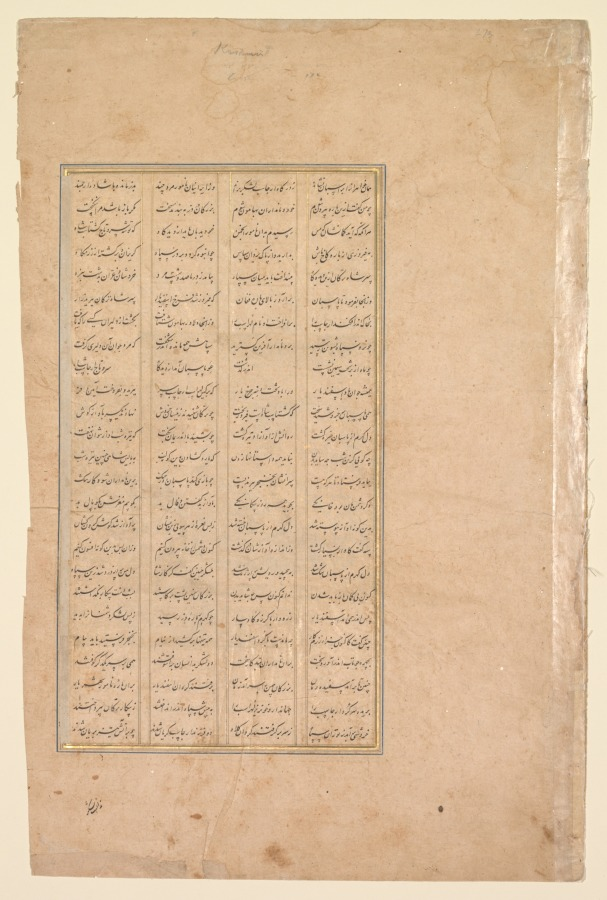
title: Isfandiyar slays Arjasp, the king of Turan, from a Shah-nama (Book of Kings) of Firdausi (Persian, about 934–1020)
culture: Mughal India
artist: Haidar Kashmiri (Indian, active late 1500s-early 1600s)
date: 1600–1605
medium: Gum tempera, ink, and gold on paper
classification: Painting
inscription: Persian inscription in left margin, in nasta‘liq script: 25 / Haidar Kashmiri; Persian title in nasta‘liq script: The Battle of Isfandiyar with Arjasp and The killing of Arjasp by the hand of Isfandiyar; Persian text in nasta‘liq script: He uttered these words, and hurried away from them Toward Arjasp’s court, bent on revenge He went forth, grasping a blade of Indian steel, Whomever of the notables his eyes fell on, was killed on the way So that in passing through the royal hall Hard it was to pick one’s way: So many wounded, battered, and dead Had turned the ground into a turbulent sea. When Arjasp awoke from his sleep His heart was troubled on hearing the din That he could not make out in the bedchamber. He put on his mail shirt and Roman-fashioned helmet Clutching in hand a burnished dagger, He shouted loud, blood coursing through his heart. The warrior Isfandiyar confronted him. They fought beyond measure and scale, Exchanging daggers and swords in a furious feud At times targeting the head, at times the waist, To him he (Isfandiyar) said, “Now from the tradesman Will you receive the gift of a blade, one glittering like a silver denarius. I have it as a gift for you, worthy enough to come from Luhrasp, inlaid with Gushtasp’s seal. He made Arjasp go limp and lifeless by the delivered cuts Nowhere on his body did he leave untouched. His mammoth body toppled over His head severed from the body by Isfandiyar. Such is the conduct of the revolving fortune: At times it offers us a honeyed potion, at others a deadly poison Why tie your heart to this transient place Since you know that you will not stay forever, do not grieve and pine. Having dealt with Arjasp, Isfandiyar Gutted the palace, its smoke reaching as far as Saturn He ordered torches lit Setting fire to the palace from all sides He entrusted his (Arjasp’s) women’s quarters to a eunuch, Taking all luster away from the place. He sealed off the treasury No one in Turan was now equal to his fight. He went to the stables and mounted A blade of Indian steel in his hand He selected among the Arab horses there And ordered them saddled A hundred and sixty men rode away from there Handpicked riders for the day of battle.; Verso: Text of Isfandiyar slays Arjasp, the king of Turan: Persian inscription in bottom margin, in nasta‘liq script: The army realized Persian text in nasta‘liq script: [cont. from recto] He furnished mounts, moreover, for his sisters, And marched forth from the court-gate of Arjasp, But left a few Iranians, men of name, With noble Sawa in the hold. “When we,” He said, “have gone outside the walls, I and my noble warriors, to the plain, Secure the gate against the Turkman troops, And may my good star aid me. When ye think That I have joined our noble troops outside, Then—let the watchmen from the lookout cry: ‘Blessed be the head and crown of Shah Gushtasp.’ And when the Turkman troops come toward the hold, In flight retreating from the battlefield, Then you shall throw the head of King Arjasp Before them from the tower of the watch.” The valiant hero rushed upon the plain, And slaughtered all the Turkmans that he found. As he approached the troops of Bishutan They saw and praised him in amazement that he, Who was so young, should show such bravery. When the moon had left her silver throne, And when three watches of the night had passed, The watchman shouted lustily, proclaiming: “Gushtasp, the Shah, has gained the victory, And may Isfandiyar be ever young. May heaven, moon, and fortune be his helpers, Who has in vengeance for Luhrasp beheaded Arjasp and, adding luster to our Grace And customs, cast him down from throne to dust, And made the name and fortune of Gushtasp Resplendent.” Hearing such a cry the Turkmans All listened while Kuhram grew dark of heart By reason of that watchman, was astonished, And spoke thus to Andariman: “How clear This cry is in the night! What do you say Can be the cause? Let us consult, for who Would dare to bawl thus by the monarch’s couch And after dark? What tricks might such a one Play in the day of battle, and thus bring Our nobles into straits! So send and have His head cut off, whoever he may be. If one of our own household is our foe, And he is backing up our enemies. “With evil words and evil presages, Then will we brain him with an evil mace.” Now when the cry went on persistently Kuhram was stricken to the heart with anger Against the watchman whose utterance, spread abroad In such a fashion, filled the nobles’ ears. The soldiers said: “The shouts increase, beyond A watchman’s! Let us drive the foemen forth And after take this host” Kuhram, who was straitened At heart about that watchman, writhed and frowned. He told the troops: “These men have filled my heart With dread about the king. We must return At once, past question. What may happen after I know not.” So that night they left the field, Where Isfandiyar, with ox-head mace And wearing mail, pursued them. When Kuhram had reached The portal of the hold, and saw the Iranians Pursuing, “What is left us,” he exclaimed: “But to fight with brave Isfandiyar? Unsheathe and send your message by the sword.” But fortune frowned and those famed chiefs fared ill. The two hosts raged and smote each other's heads Till morning came, and then the chiefs of Chin Had had their day. Ascending to the ramparts The warriors of Isfandiyar inside The hold flung down therefrom the severed head Of brave Arjasp—the king that had slain Luhrasp. The Turkmans fought no longer; from their host Arose a cry, and all the troops unhelmed. The two sons of Arjasp wept and were consumed As in a fierce fire, while all the army knew What they must weep for on that evil day. (closely adapted from Warner and Warner 1912, 152)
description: This illustrated scene occurs early in the narrative of Isfandiyar, who is destined to serve as king of Iran with Rustam as his champion. The episode describes Isfandiyar’s quest for vengeance against the tyrant Arjasp of Turan, who had defeated his father in battle and taken his sisters captive. Isfandiyar disguised himself as a merchant, entered Arjasp’s fort, and then fought his way to the enemy king, whom he defeated in battle. The artist has included beautiful and delicate details of the garden and architectural setting of this gruesome scene. An onlooker below puts his finger to his mouth in a gesture of astonishment.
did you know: Wine spilling from a porcelain bottle heightens the action of the moment.